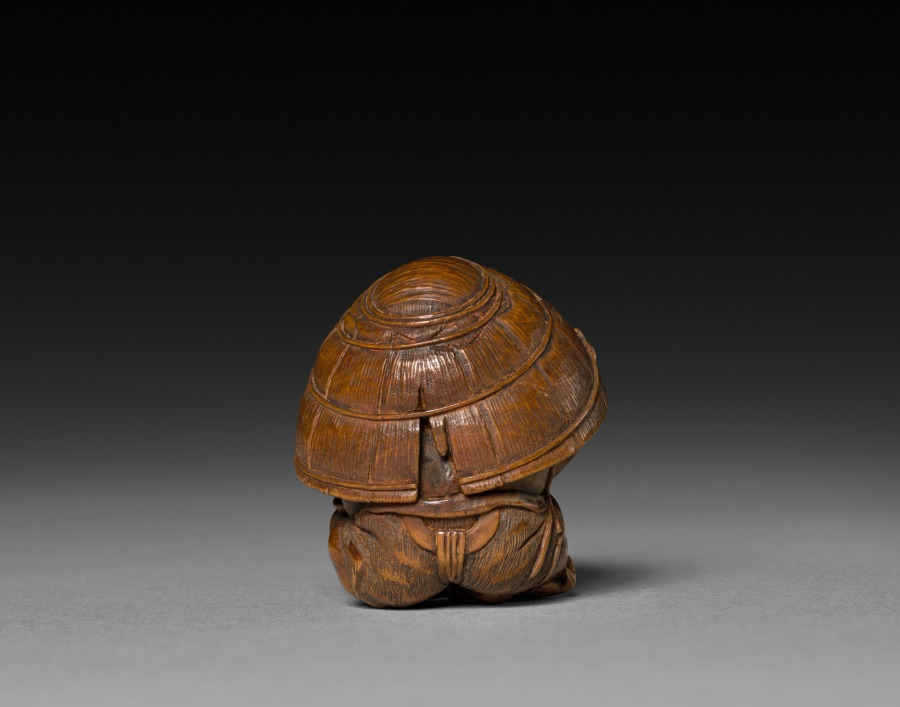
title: Demon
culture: Japan, Edo period (1615–1868)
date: 1615–1868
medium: wood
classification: Netsuke